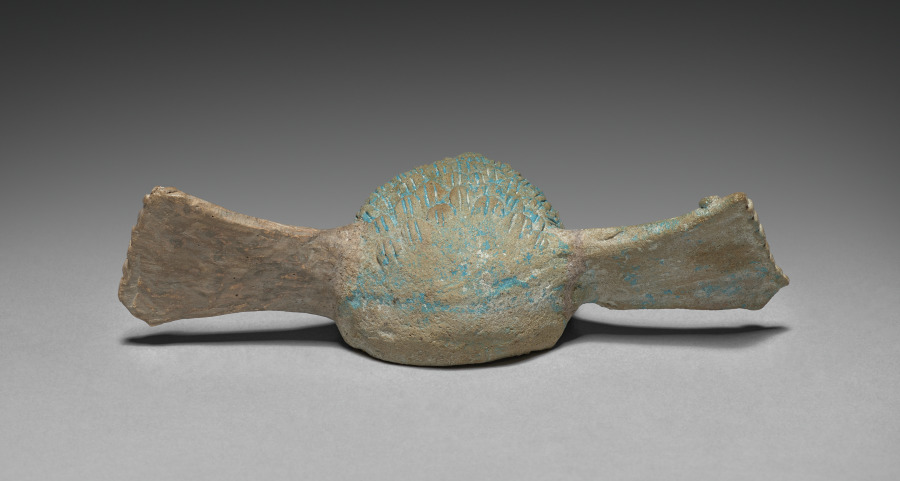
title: Warrior Figurine with Removable Headdress (headdress)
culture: Mexico, Yucatán, Jaina Island region, Campeche, Maya style (250-900)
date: 600–900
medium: earthenware with pigment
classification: Sculpture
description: The major offerings placed in the Maya graves of Jaina Island were ceramic figurines, some of Mesoamerica's finest, that depict deities and humans in a variety of roles. This removable headdress belongs to a warrior figure who once probably held weapons and wears either quilted cotton armor or the feathered uniform of a military order. We don't know why such figures are often pot-bellied.